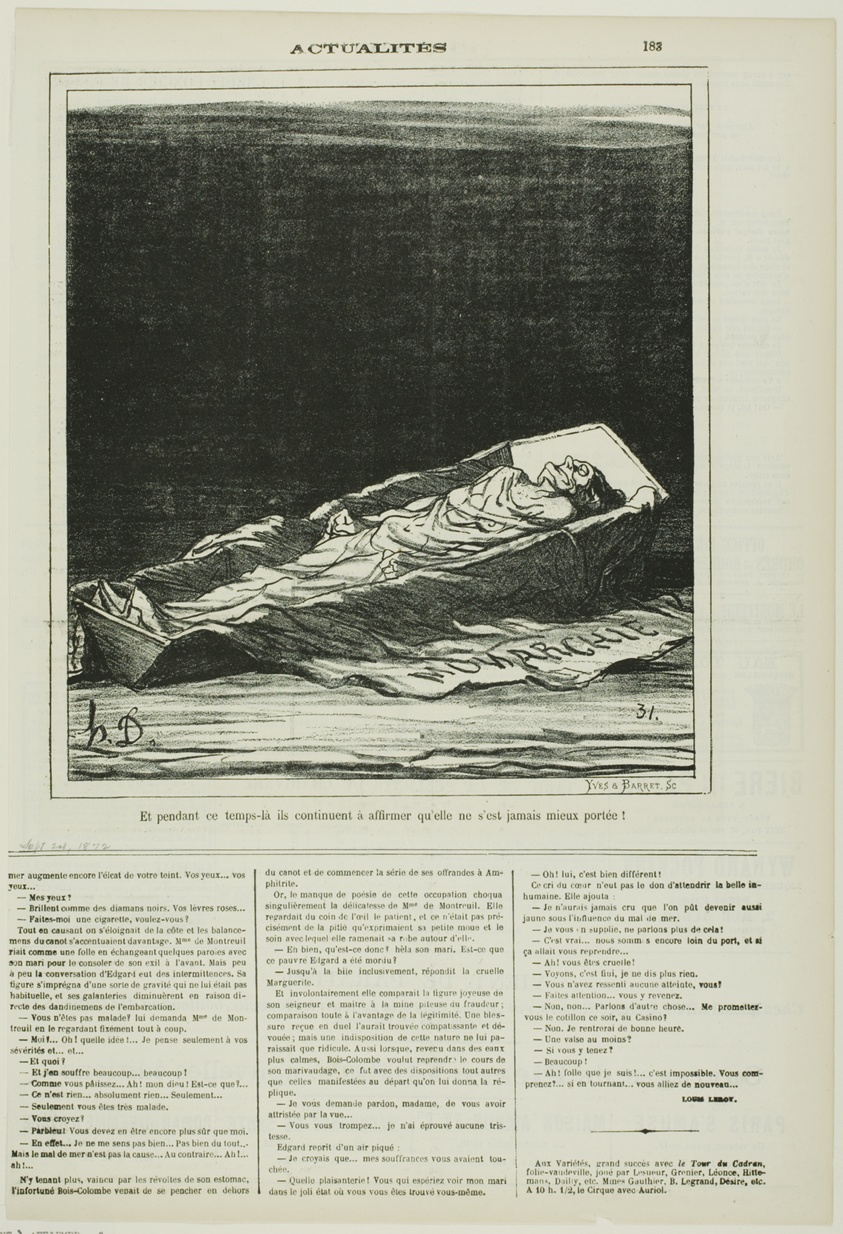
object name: Print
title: Meanwhile They Keep on Insisting that She Has Never Been Better, plate 183 from Actualités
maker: Honoré Victorin Daumier; French, 1808-1879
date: 1872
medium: Lithograph in black on white wove paper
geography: France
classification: lithograph; print; prints and drawing